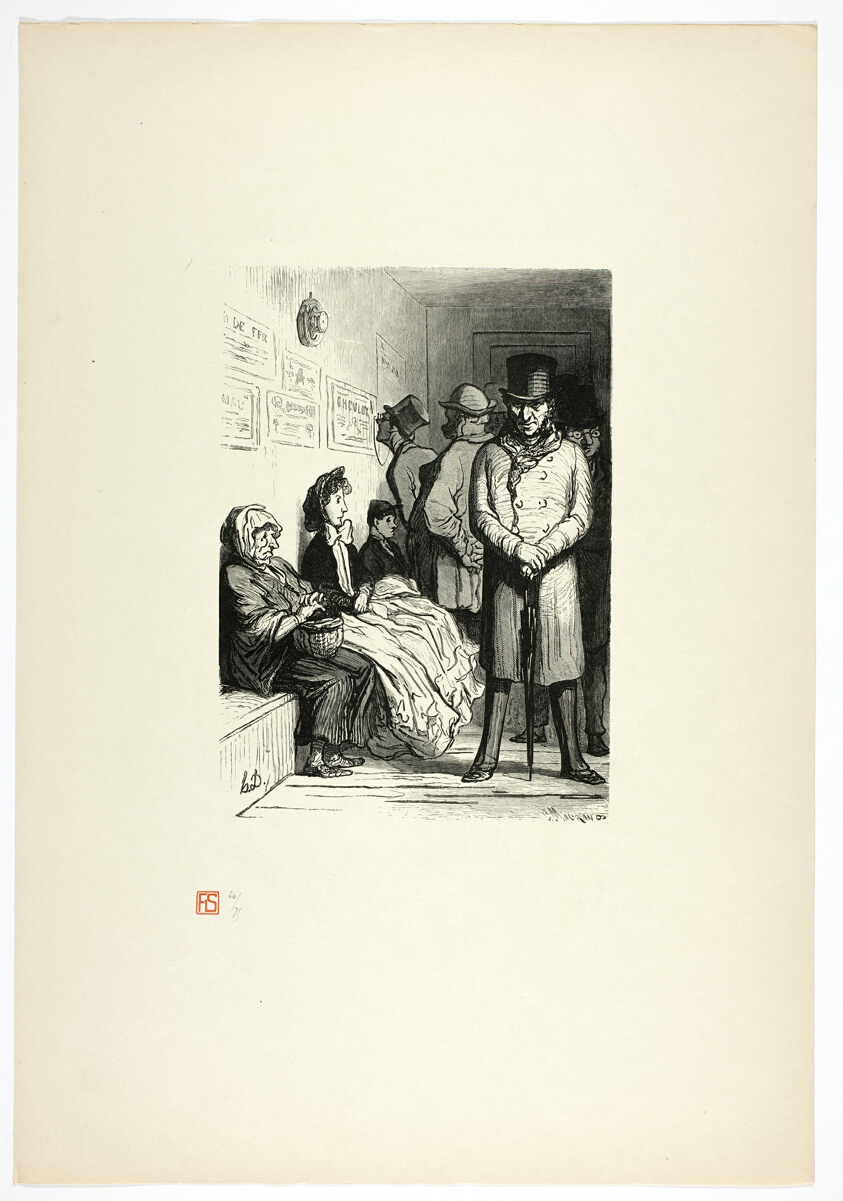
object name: Print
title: Un bureau d'attente d'omnibus, from Tirage Unique de Trente-Six Bois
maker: Charles Maurand (French, 1824-1904); after Honoré Victorin Daumier (French, 1808-1879); printed by François Louis Schmied (Swiss, 1873-1941); published by Jules Meynial (French, 20th century)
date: 1862, printed 1920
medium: Wood engraving on cream Japanese paper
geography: France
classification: wood engraving; print; prints and drawing